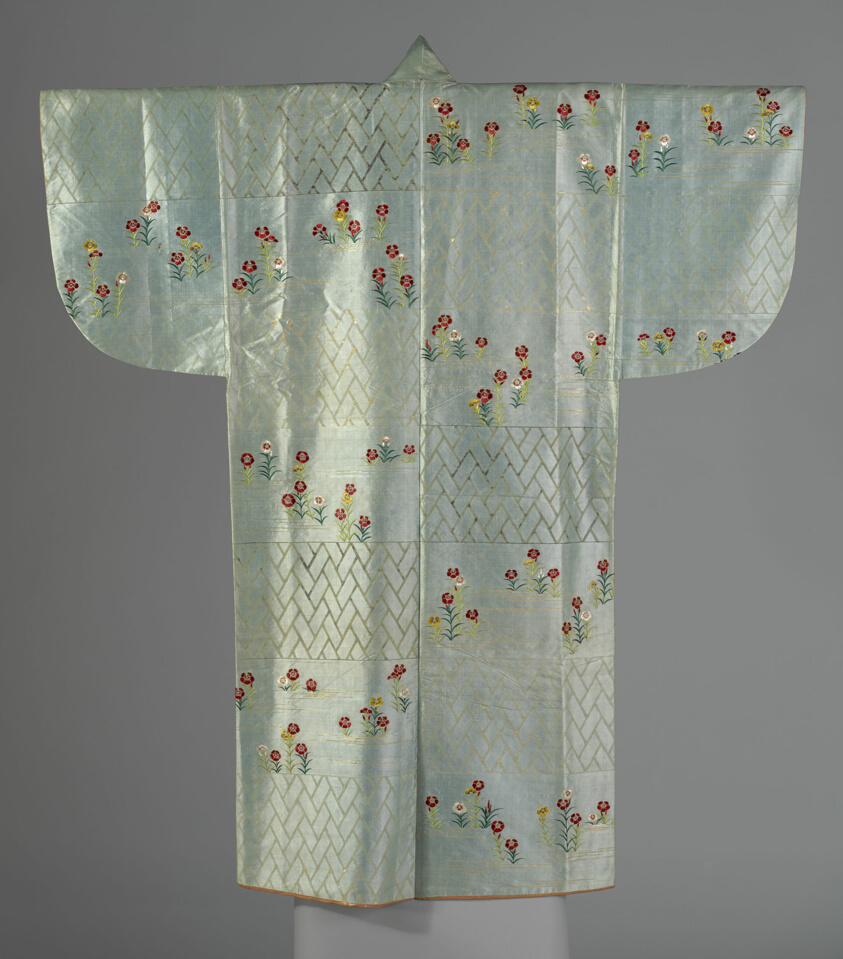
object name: Costume and Accessories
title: Nuihaku (Noh Costume)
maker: Japan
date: late 17th/ early 18th century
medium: Silk, plain weave; stamped with gold and silver leaf over adhesive (inkin); emroidered with silk in satin and couching stitches; lined with silk, plain weave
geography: Japan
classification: needlework (visual works); weaving - printed; costume